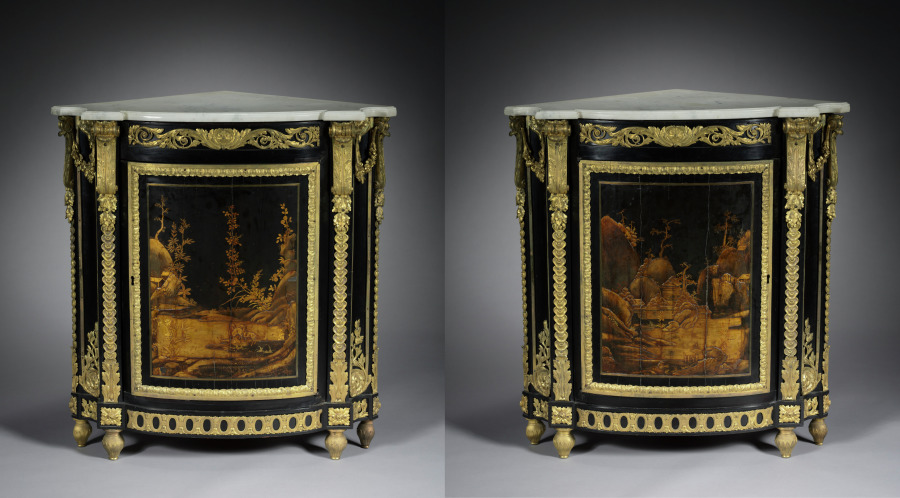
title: Pair of Corner Cabinets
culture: France, Paris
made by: René Dubois (French, 1737–1798)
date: c. 1765– 1770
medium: ebony veneer, Japanese lacquer, gilt bronze mounts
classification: Furniture and woodwork